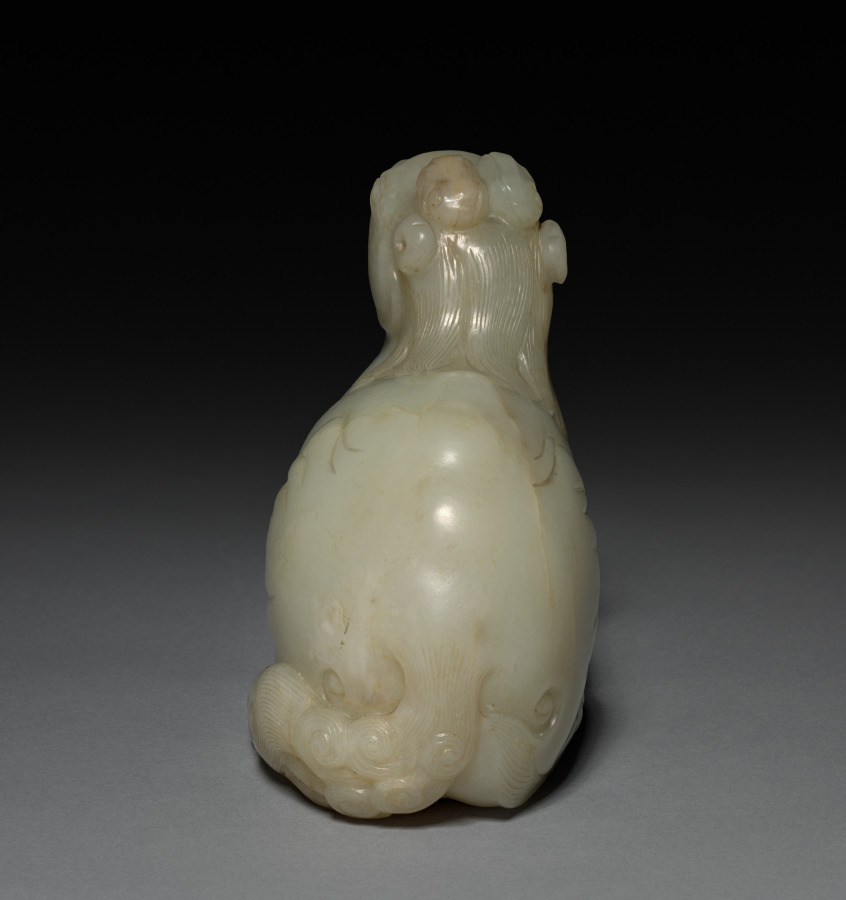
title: Fantastic Animal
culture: China, Qing dynasty (1644-1911)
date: 1700s–1800s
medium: jade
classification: Jade